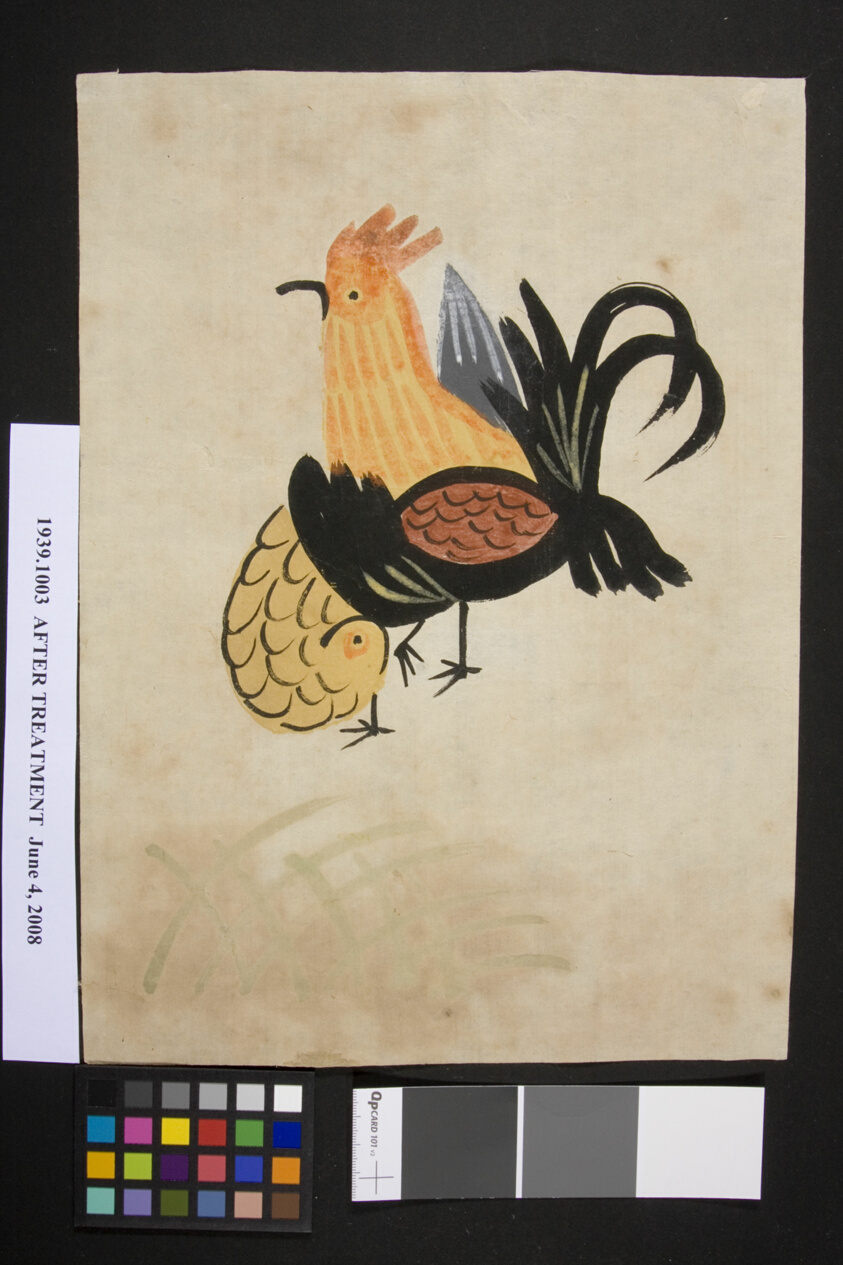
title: Cock and Hen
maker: Japanese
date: 18th century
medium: Unmounted painting; ink and colors on paper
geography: Japan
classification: woodblock print; print; asian art